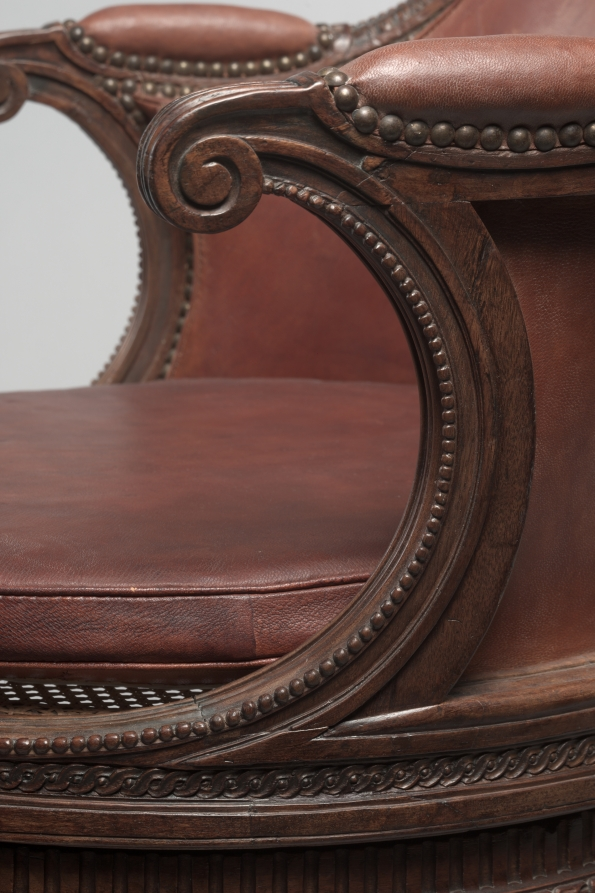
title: Desk Chair with Swivel Mechanism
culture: France, Paris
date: c. 1780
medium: walnut with caning and leather upholstery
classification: Furniture and woodwork